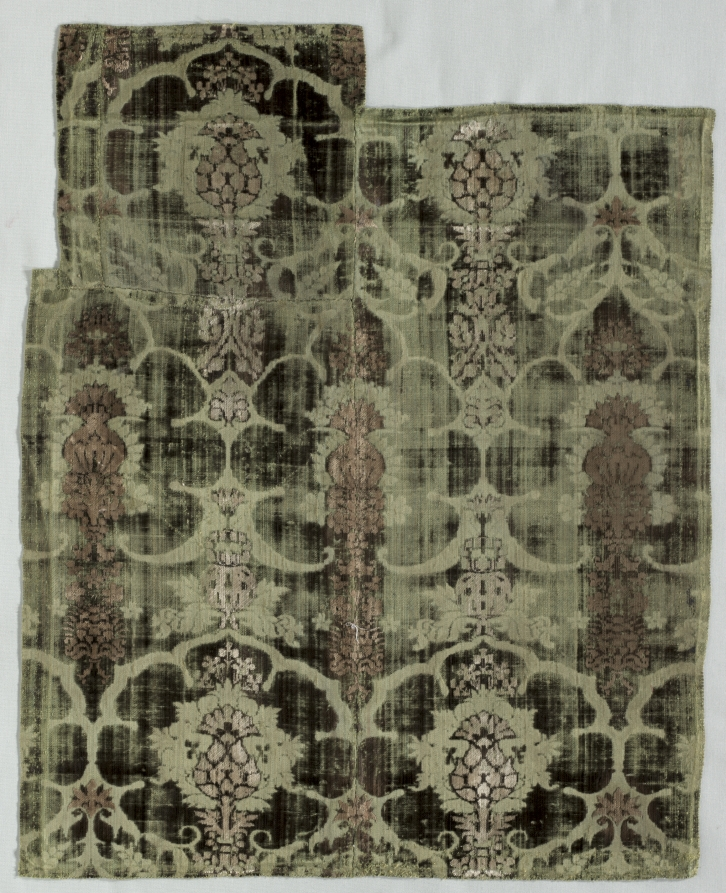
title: Velvet Fragment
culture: Italy, 15th century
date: 1400s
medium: velvet (cut and voided); silk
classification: Velvet